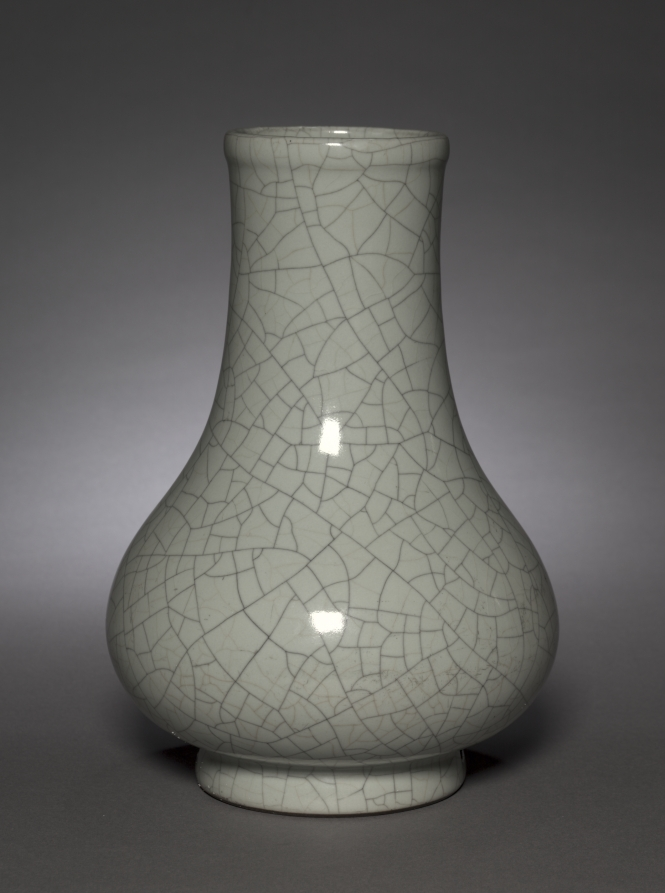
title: Vase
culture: China, Jiangxi province, Jingdezhen kilns, Qing dynasty (1644-1911), Yongzheng mark and reign (1723-35)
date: 1723–35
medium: porcelain with a crackled Guan-type glaze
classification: Ceramic